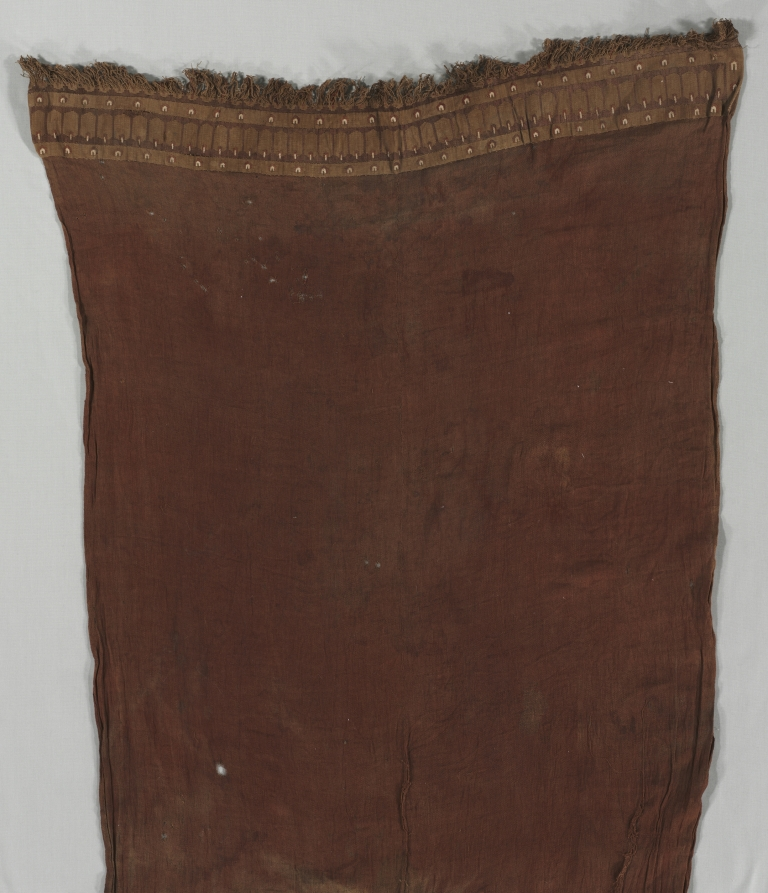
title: Loincloth with Feather(?) Motifs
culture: Peru, Central Andes, Chimú or Chimú-Inka, 11th-16th century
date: 1000–1532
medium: plain weave, tapestry weave; cotton, camelid fiber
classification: Textile